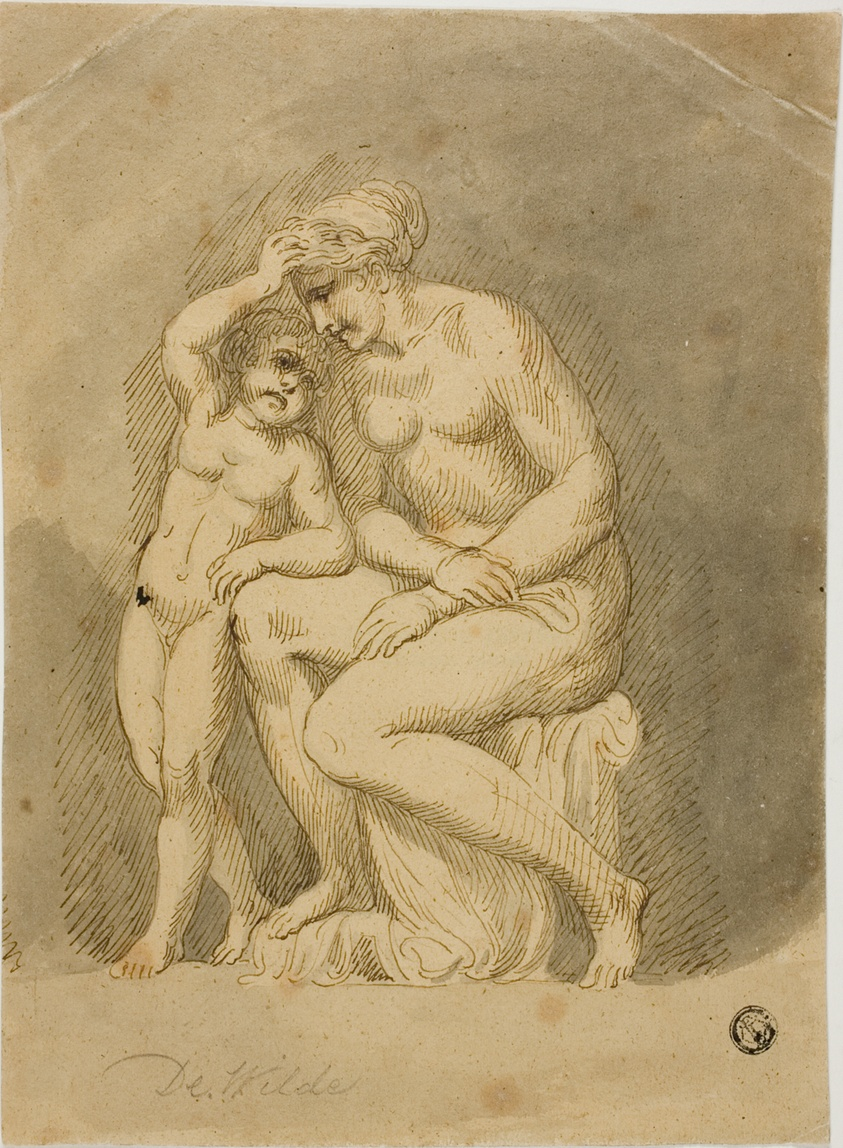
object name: Drawing and Watercolor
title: Venus and Cupid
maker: Attributed to Samuel De Wilde; English, 1748-1832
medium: Pen and brown ink with brush and gray wash, over traces of graphite, on tan wove paper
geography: England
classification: pen and ink drawings; drawings (visual works); prints and drawing